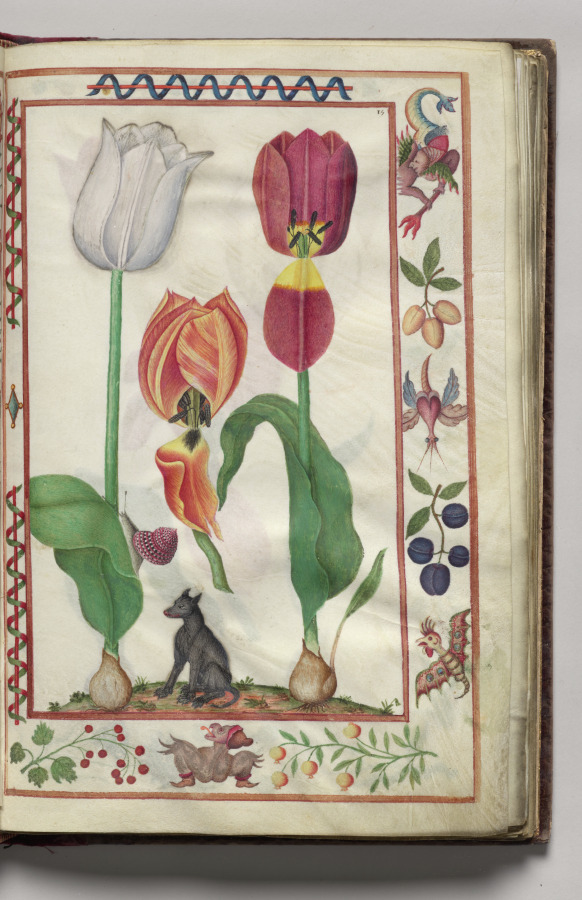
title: Tulips, Snail, and Dog with Hybrid Creature Border, folio 8 (recto), from Florilegium (A Book of Flower Studies)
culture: France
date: 1608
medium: watercolor, ink, silver, and gold over occasional traces of pencil, on vellum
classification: Bound Volume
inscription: Dated: Poitiers 1608 (on frontispiece) Signed: On frontispiece in black ink, lower right: Van Kuyk Notation on drawing: Frontispiece: in pencil, lower margin: * élève de Van Kessel, peintre flammand (* in pencil also appears in front of Van Kuyk's name).